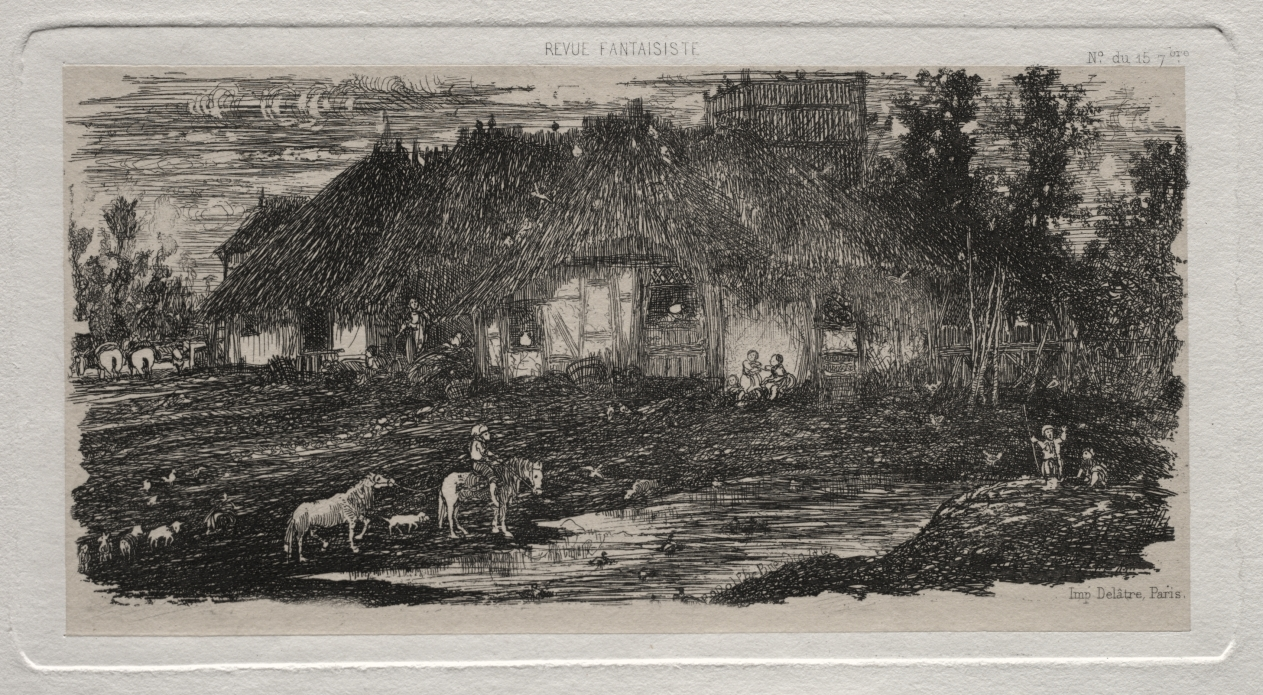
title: The Farm-Yard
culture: France, 19th century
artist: Rodolphe Bresdin (French, 1822–1885)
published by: Auguste Delâtre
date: 1861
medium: etching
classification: Print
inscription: lower right, in plate (in image): RoDolphe Bresdin 1861; lower right, in plate: Imp. Delâtre; upper center, in plate: REVUE FANTASIE; upper right, in plate: No. du 15 7bre